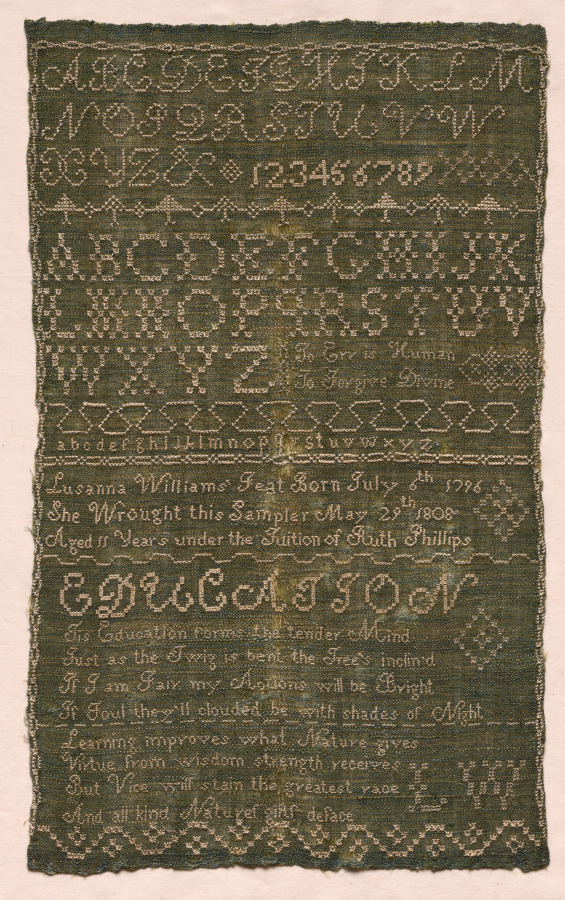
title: Sampler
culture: America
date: 1808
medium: embroidery, silk on homespun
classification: Sampler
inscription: panel with narrow border enclosing alphabets and numerals from one to nine and inscriptions: "Susanna Williams' Feat Born July 6th 1796/ She Wrought this Sampler May 29th 1808/ Aged 11 Years under the Tuition of Ruth Phillips." Another inscription appears below.